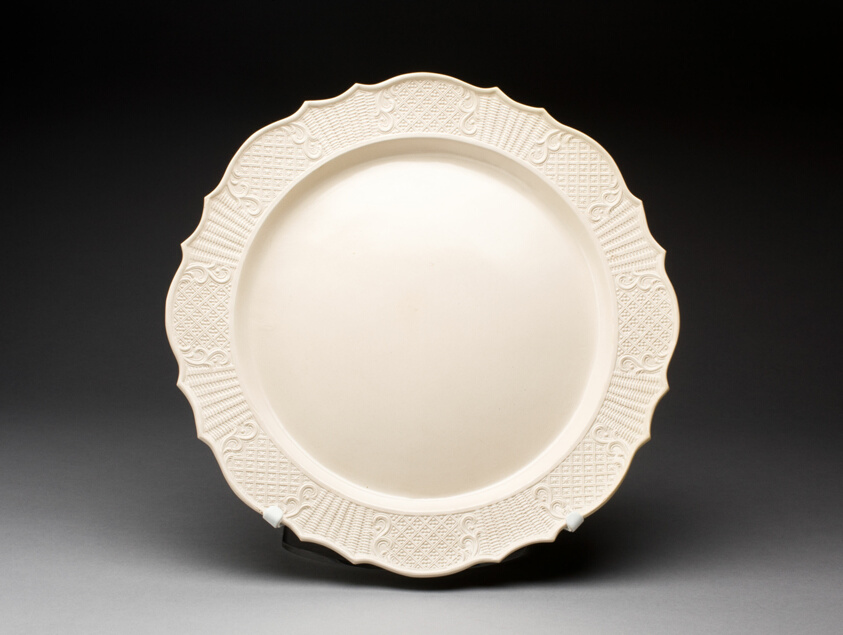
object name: Ceramics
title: Dish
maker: England, Staffordshire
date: 1750/59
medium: Salt-glazed stoneware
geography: Staffordshire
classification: dish (vessel); stoneware; european decorative arts; salt-glazed stoneware; ceramics